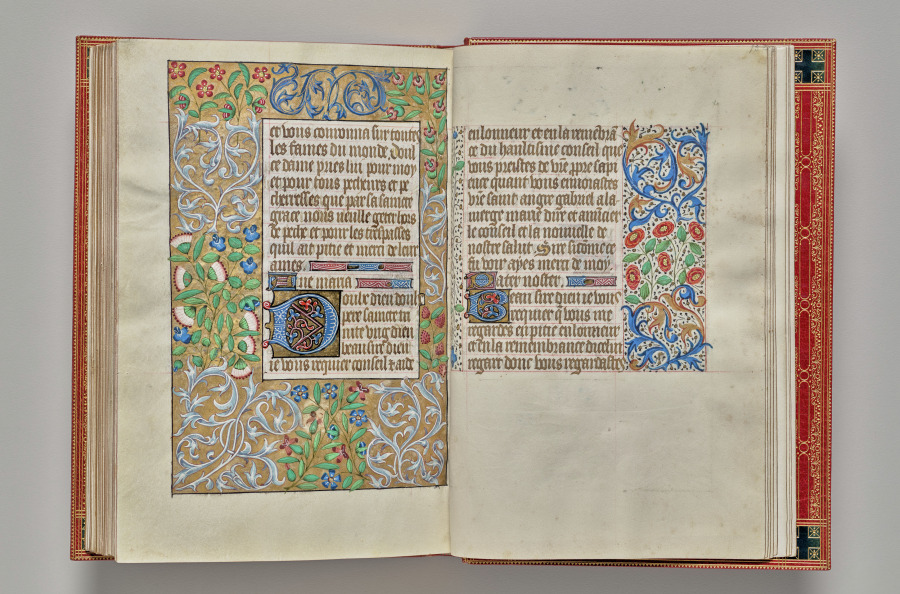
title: Book of Hours (Use of Rouen): fol. 152r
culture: France, Rouen, 15th century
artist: Master of the Geneva Latini (French, active Rouen, 1460–80)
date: c. 1470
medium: ink, tempera, and gold on vellum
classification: Bound Volume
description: In the late 1400s and early 1500s Rouen was an established and important center of book production. The city’s cathedral had a wealthy chapter that spent large sums of money to commission books and to maintain its extensive library. The stationers and booksellers would have likely been concentrated in or near the cathedral precinct. This artist, named after a manuscript now in Geneva, was Rouen’s principal illuminator during the second half of the 1400s.